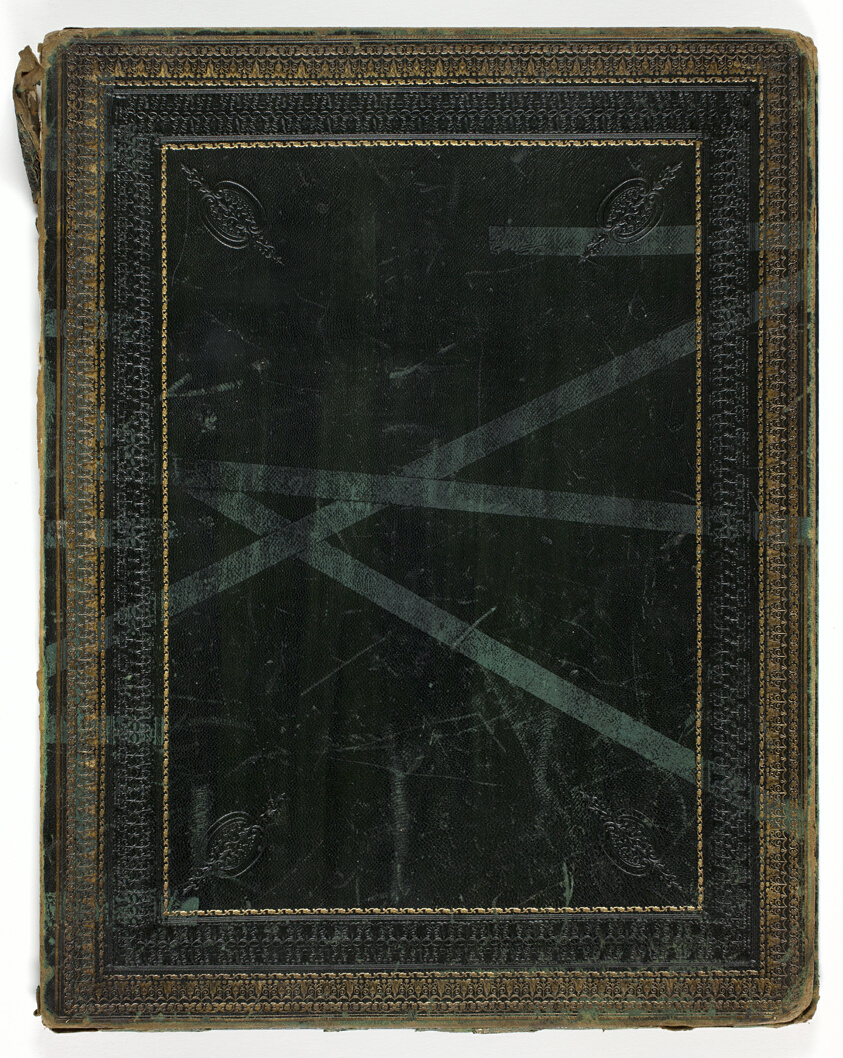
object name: Print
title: Text and cover, from Illustrations of the Bible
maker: John Martin (English, 1789-1854)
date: 1833–35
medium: Portfolio cover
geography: England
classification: portfolio cover; print; letterpress; prints and drawing; portfolio